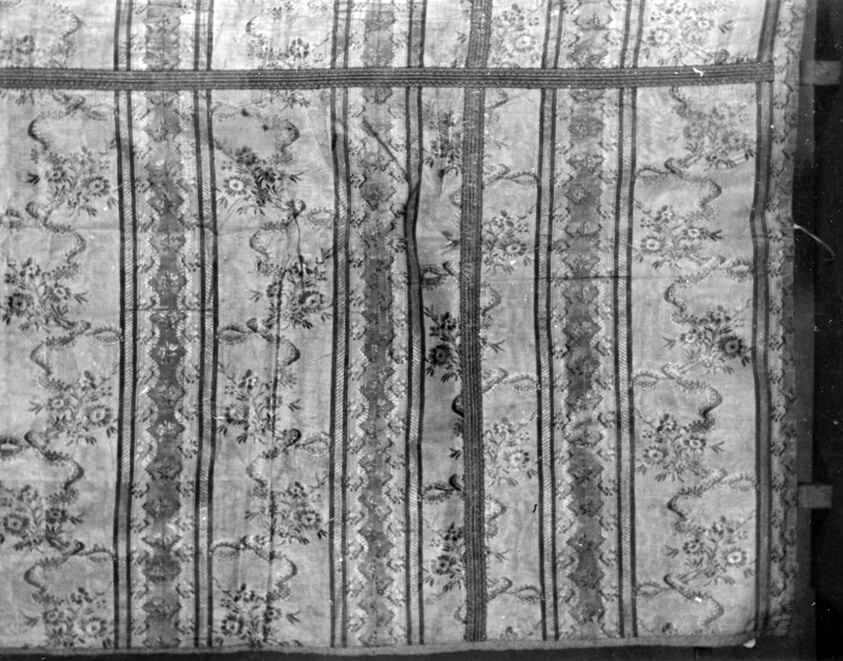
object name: Textile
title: Panel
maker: France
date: 1780/90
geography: France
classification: textile; weaving